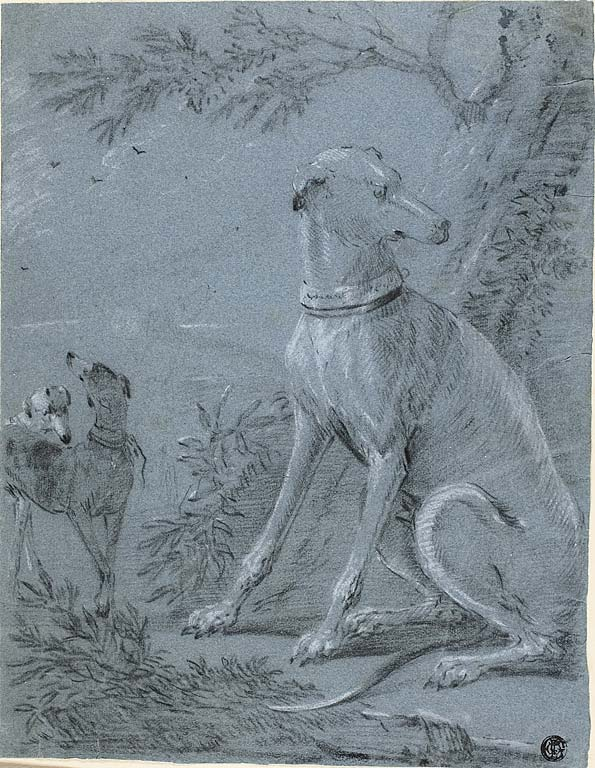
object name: Drawing and Watercolor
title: Seated Hound Beside Trees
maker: Style of Jean-Baptiste Oudry; French, 1686-1755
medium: Black chalk, heightened with white chalk, on blue laid paper, tipped on cream wove paper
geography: France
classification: chalk; drawings (visual works); prints and drawing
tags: dogs, animals